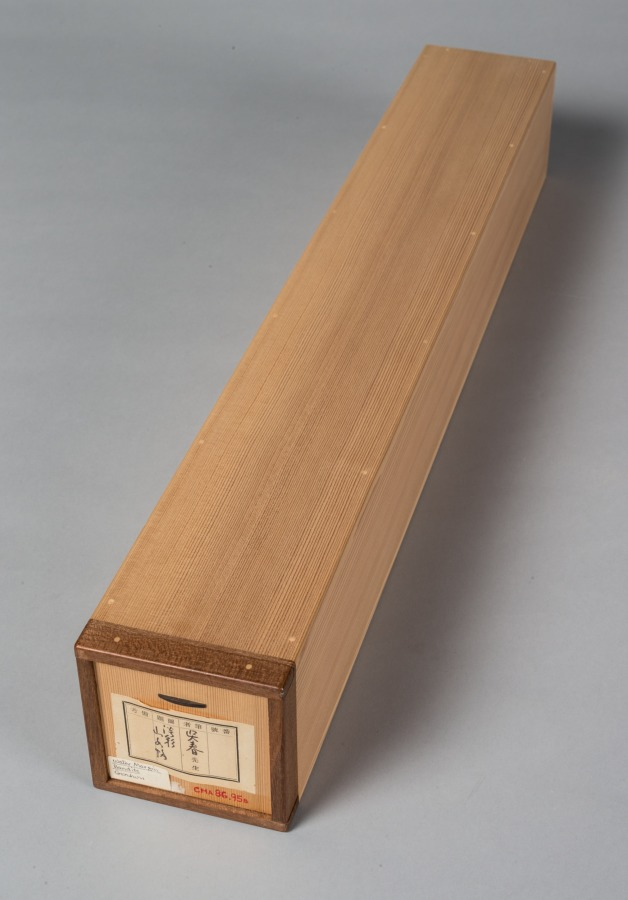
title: Happy Forest, from Water Margin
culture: Japan, Edo period (1615–1868)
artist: Matsumura Goshun (Japanese, 1752–1811)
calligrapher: and Amenomori Shōteki (Japanese, 1731–1786)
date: late 1700s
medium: hanging scroll; ink and color on paper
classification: Painting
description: The Chinese literary classic Water Margin is set in the 1120s and tells the story of 108 outlaws who first rebel against the government and then join forces with it. This painting depicts an episode in which hero Wu Song reclaims the tavern Happy Forest for its rightful owner, the prison warden’s son, Shi En. To prepare for the fight, Wu Song drinks a lot of wine. The painting was inscribed with a quote in which an ally describes Wu Song’s fighting style. It reads as follows: Where his twin fists rise, clouds and thunder roar, When his flying kick comes, wind and rain tremble.